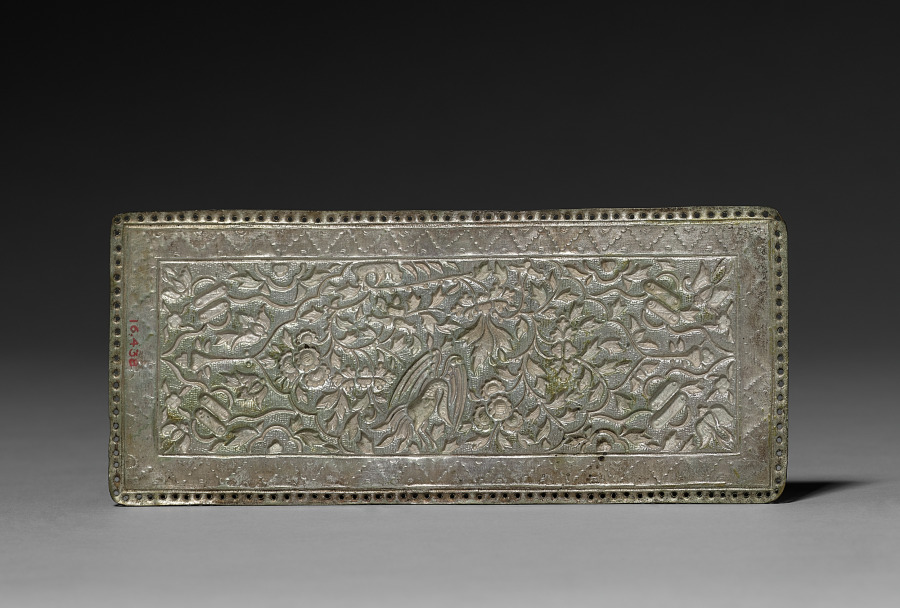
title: Pillow-end Plate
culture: Malaysia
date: 1800s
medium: white metal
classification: Metalwork